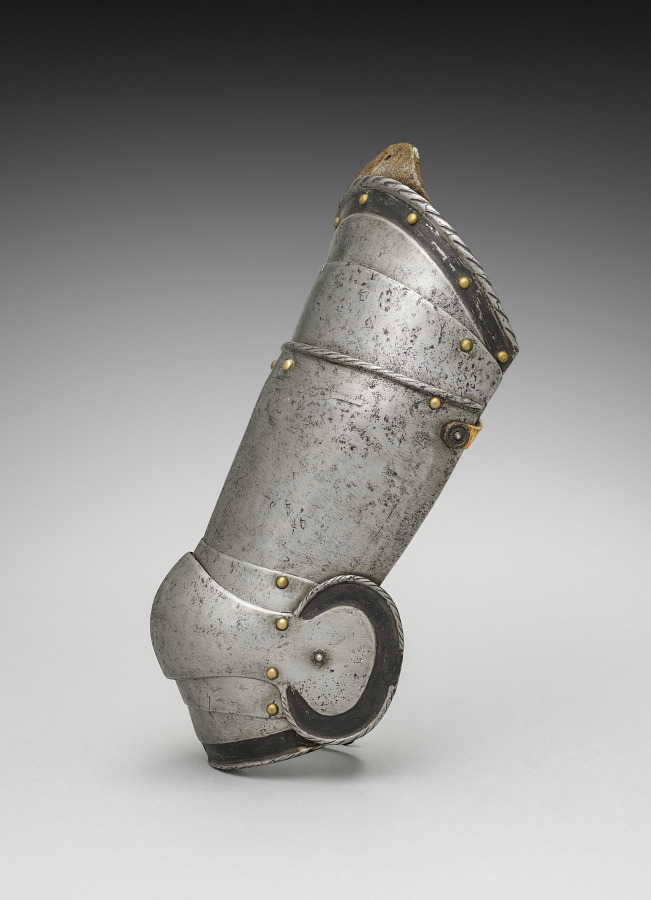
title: Left Cuisse with Poleyns (knee-cops)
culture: Germany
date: c.1550–1570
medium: iron, steel, leather and brass rivets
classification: Arms and Armor